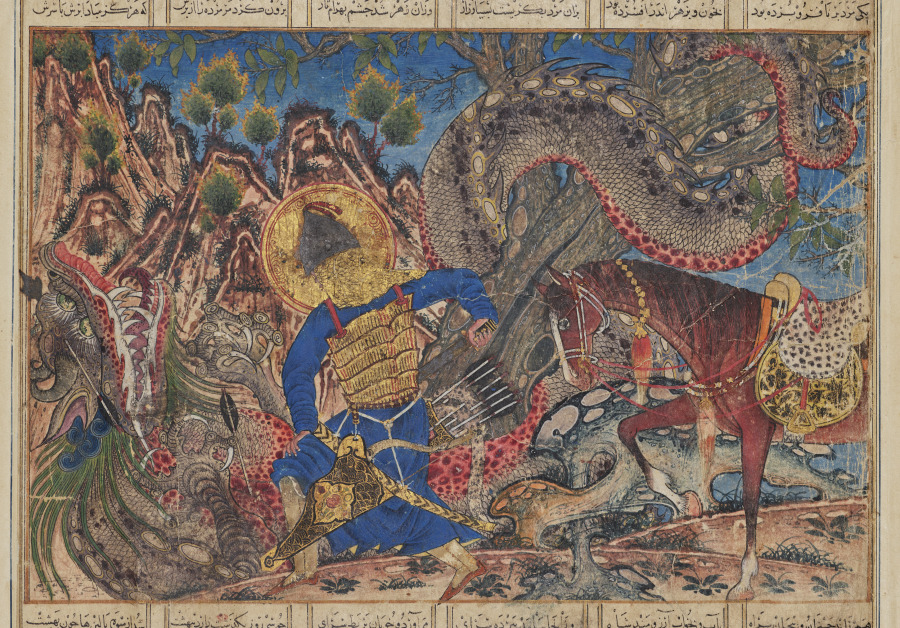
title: Bahram Gur Slays a Dragon (verso), from a Shahnama (Book of Kings) of Firdausi (940–1019 or 1025), known as the Great Mongol Shahnama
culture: Iran, Tabriz, Ilkhanid period (1256-1353)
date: 1330–35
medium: opaque watercolor, ink, and gold on paper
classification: Manuscript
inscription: Script: Naskh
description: In this intense painting, Bahram Gur plunges his sword into the breast of a dragon. A favorite character from Iran's pre-Islamic history, Bahram Gur (reigned 420–38 CE) was a popular ruler of the Sasanian dynasty and a great hunter. He took the name "Gur," meaning onager (a wild ass), because it was his preferred game, although he also excelled at killing dragons. As evidenced by this illustration's rock formations, tree trunk, and dragon, Iranian painting in the Mongol period borrowed numerous stylistic and spatial elements from Chinese models. With the surging landscape and writhing dragon rendered with equal energy, this is a picture of extraordinary unity and concentration.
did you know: The monumental Great Mongol Shahnama was commissioned by a ruler of the Ilkhanid dynasty, which governed the southwestern part of the Mongol Empire.